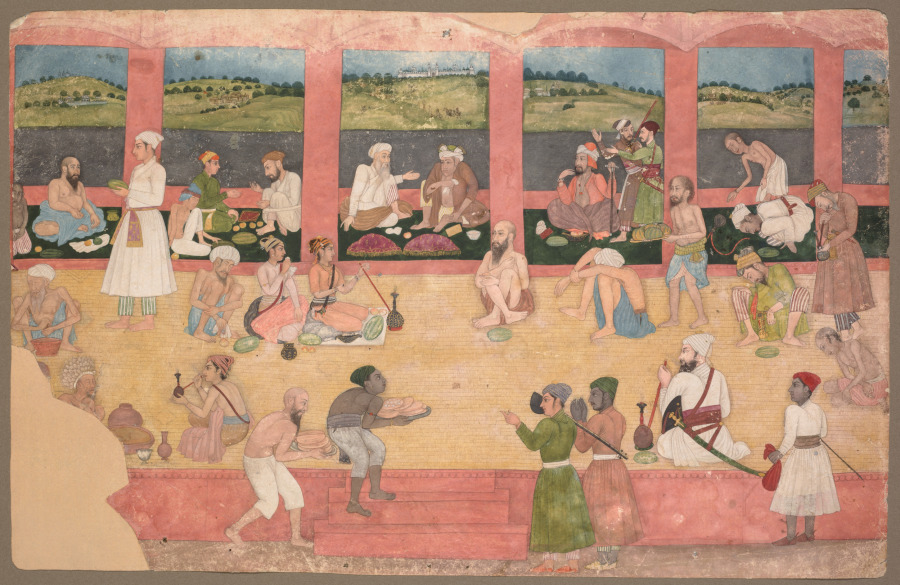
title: Opium Smokers Served Fruit and Bread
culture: India, Mughal Dynasty (1526-1756)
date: c. 1750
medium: Gum tempera and gold on paper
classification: Painting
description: A red sandstone terrace and veranda covered with a straw mat is the setting for an assemblage of more than 30 religious figures and nobles, most of whom are depicted in varying stages of intoxication and hangovers. To the left of center is a female ascetic wearing a peach-colored robe, and throughout the composition Sufi mystics wearing blue are interspersed with white-robed clerics and Mughal nobles. Some lucidly engage in discussions, while others prepare, ingest, and experience the effects of cannabis or opium known to have been taken regularly by those seeking mind-altering states. Watermelons, apples, and flatbread are being distributed among the assembled guests.